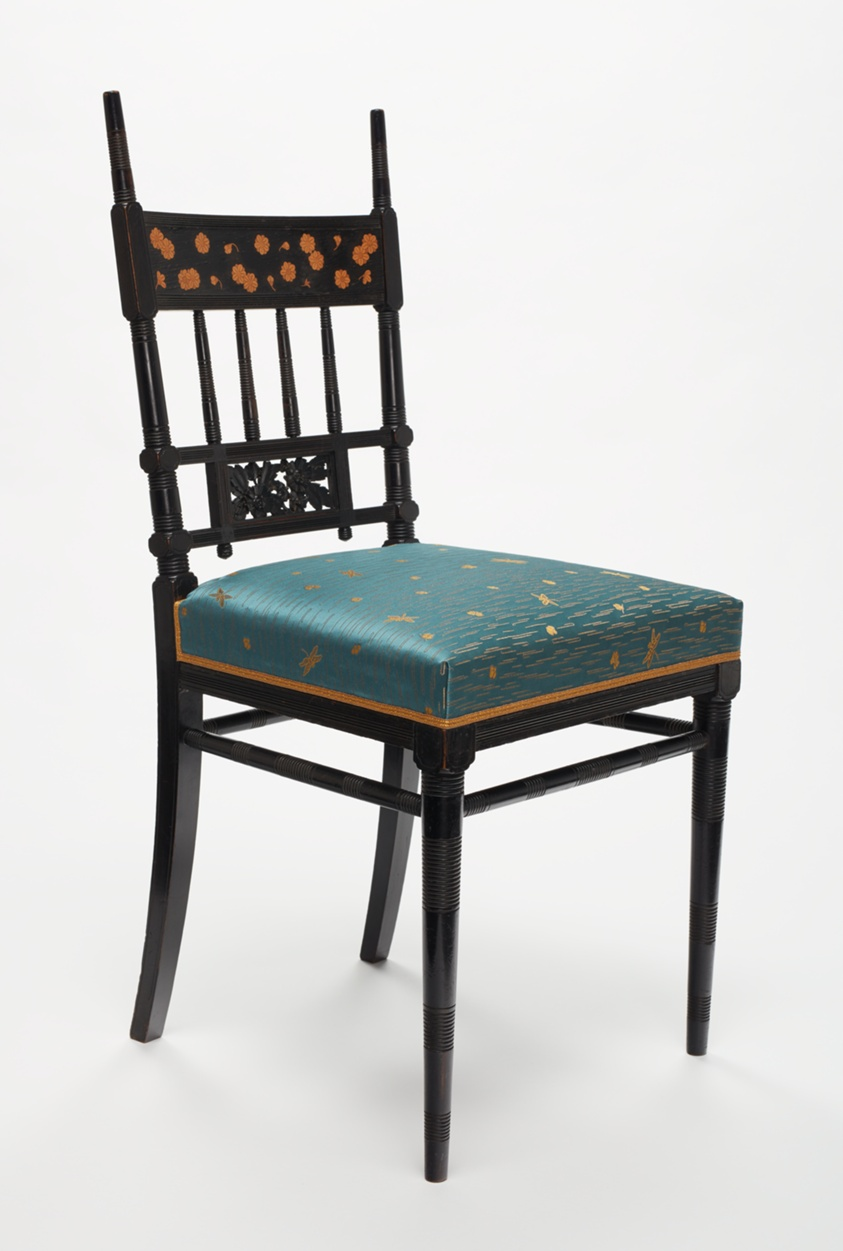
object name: Furniture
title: Side Chair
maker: Herter Brothers (American, 1864–1906); New York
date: 1877–85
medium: Ebonized cherry, various inlaid woods, and upholstery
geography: New York City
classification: seating; furniture; american decorative arts; american arts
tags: furniture